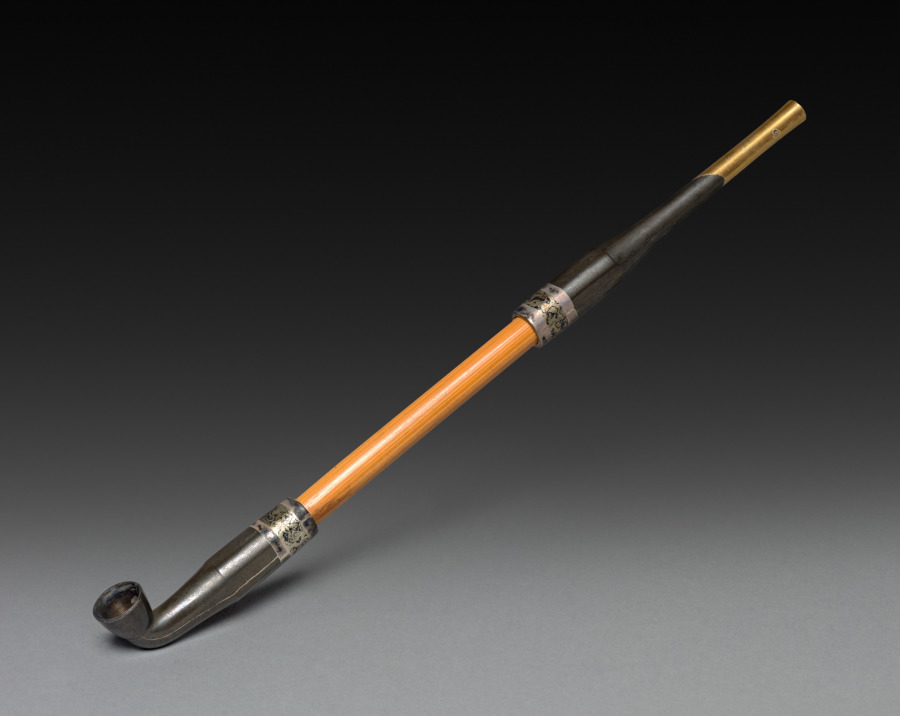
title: Tobacco Pipe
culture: Japan, Edo period (1615–1868)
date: early to mid-1800s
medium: bamboo, iron, and silver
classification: Miscellaneous